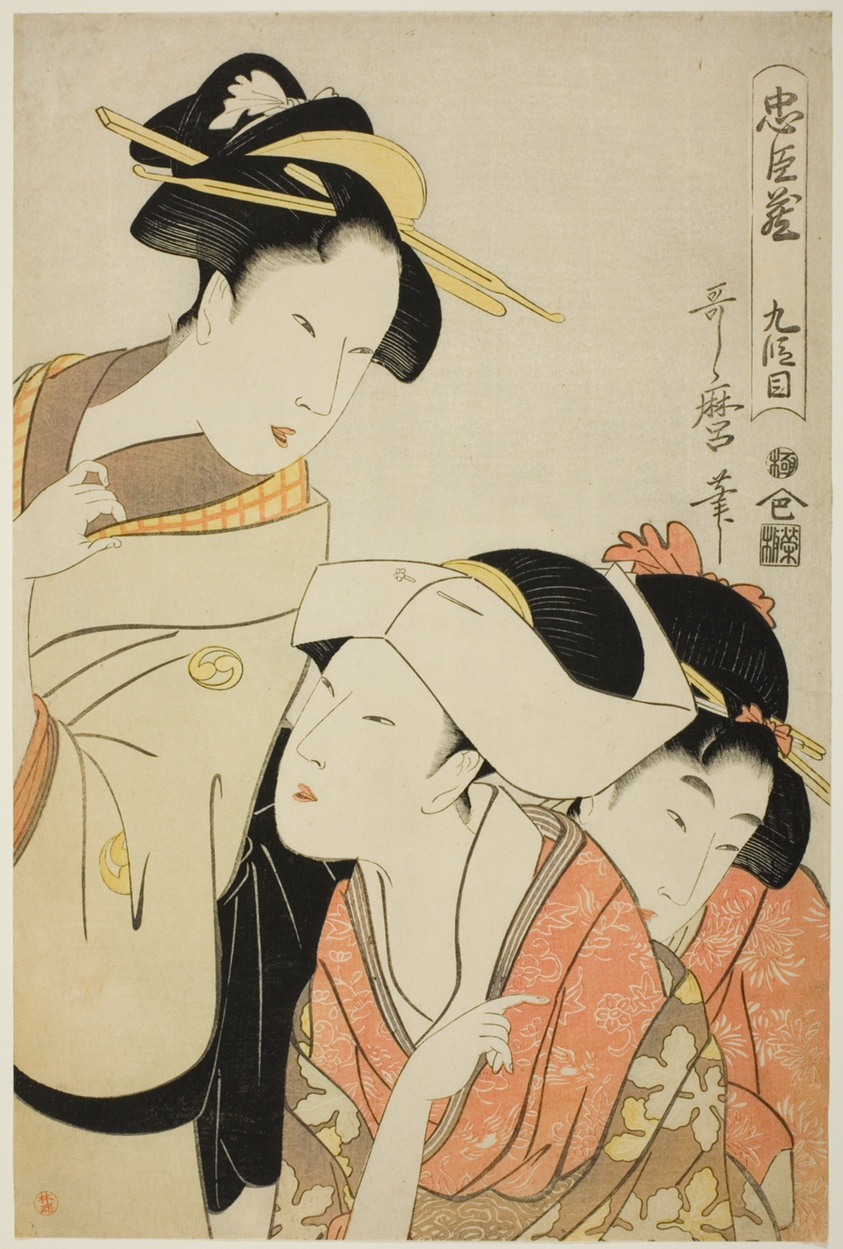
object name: Print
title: Act IX (Kudanme), from the series “The Treasury of Loyal Retainers (Chushingura)"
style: Japanese (culture or style)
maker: Kitagawa Utamaro 喜多川 歌麿; Japanese, 1753 (?)-1806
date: c. 1798/99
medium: Color woodblock print; oban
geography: Japan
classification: woodblock print; print; asian art